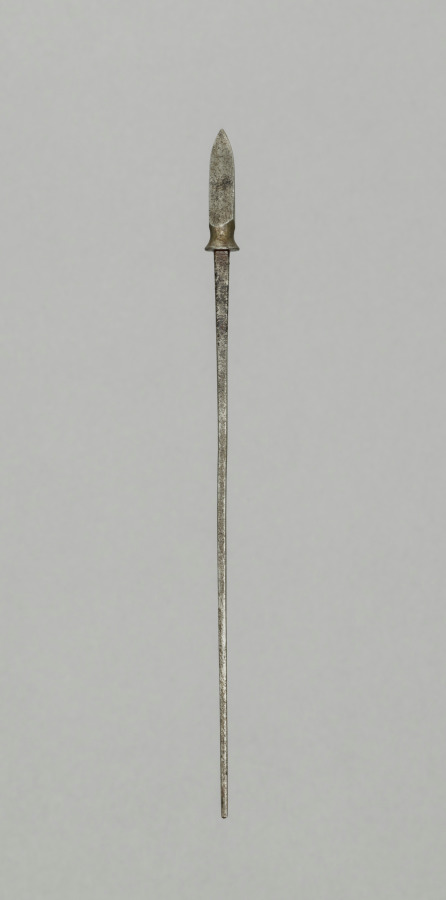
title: Arrow Point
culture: Japan, Edo period (1615–1868)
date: 1700s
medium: steel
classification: Arms and Armor